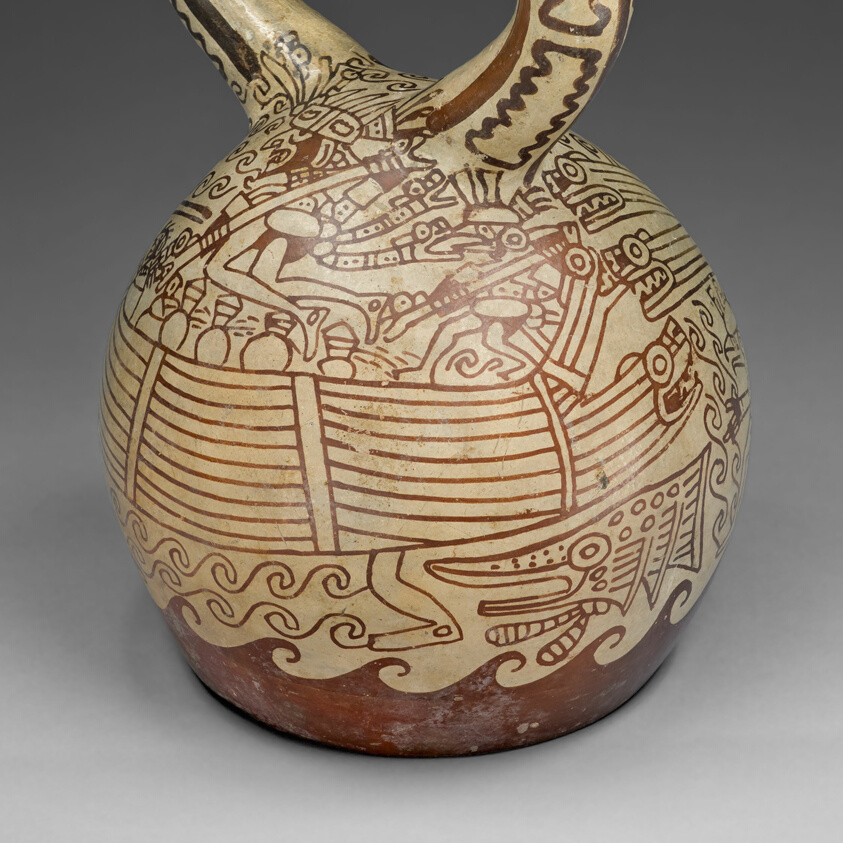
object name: Vessel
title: Stirrup Vessel with Fineline Painting Depicting a Figures in Reed Boat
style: moche, mochica v, mochica, early intermediate period, Pre-Columbian, americas, Arts of the Americas, andean, andes, south american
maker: Moche (North coast, Peru)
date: 100 BCE–500 CE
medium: Ceramic and pigment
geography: Peru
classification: earthenware; ceramics; vessel; art of the americas